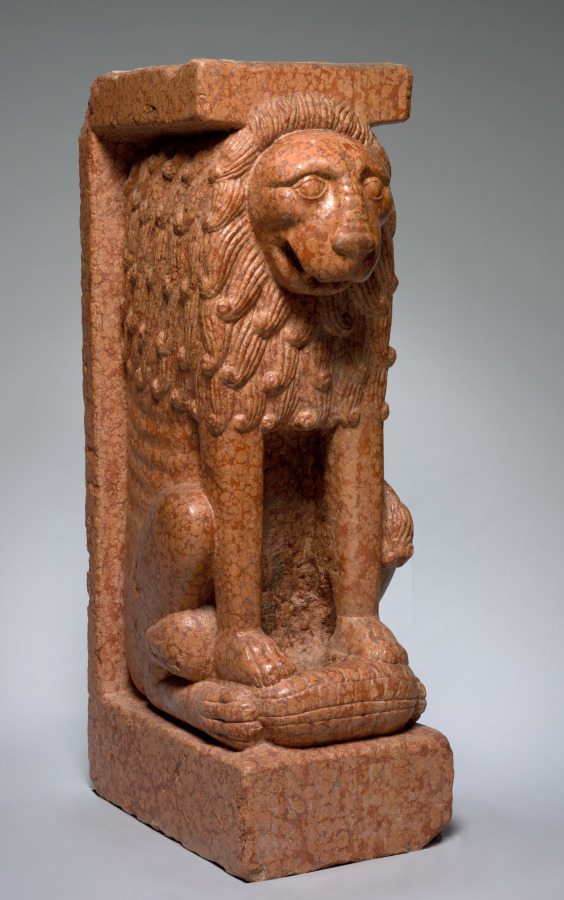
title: Supporting Lion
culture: Italy, style of the 13th century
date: style of the 1200s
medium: pink limestone (known as "Verona Marble")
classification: Sculpture